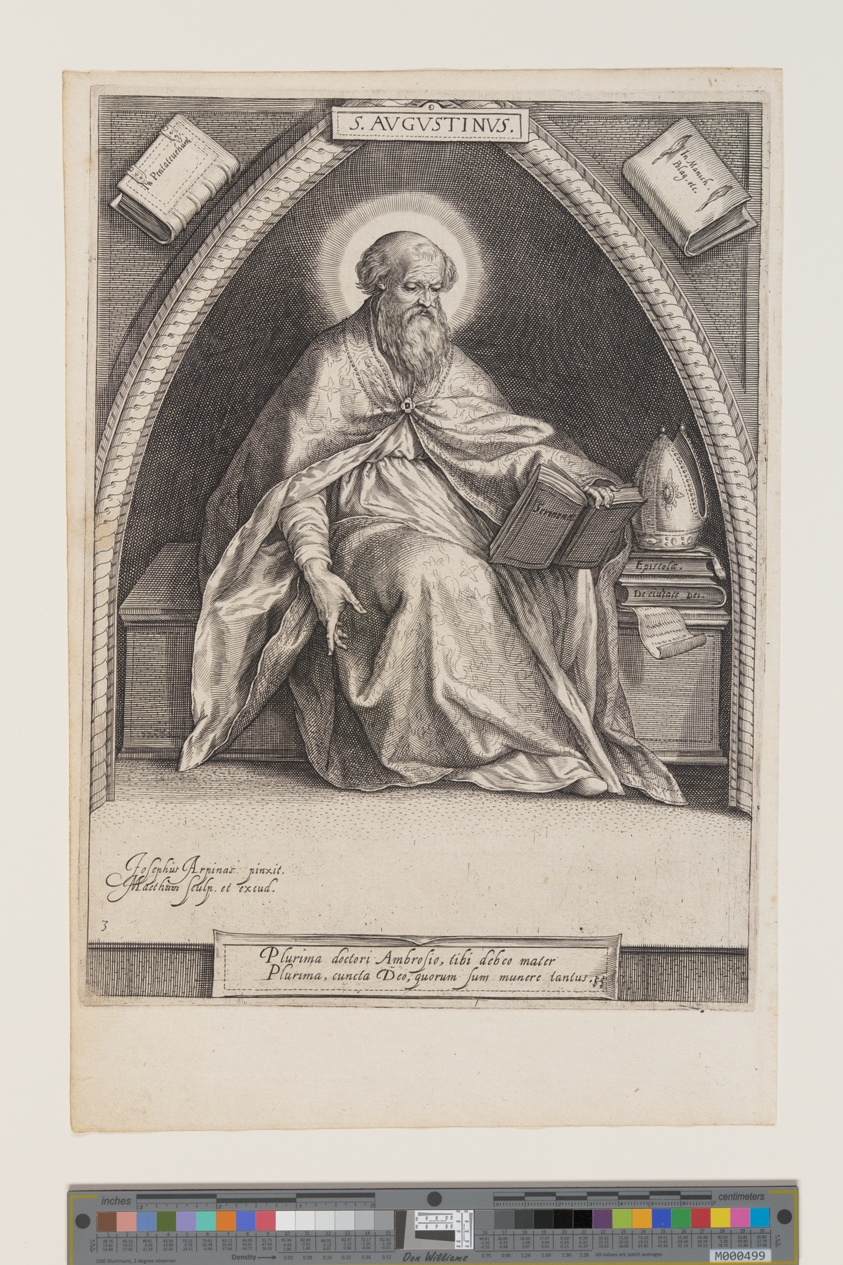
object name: Print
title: St Augustine, from The Fathers of the Church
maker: Jacob Matham (Dutch, 1571–1631); after Giuseppe Cesari (Italian, 1568–1640)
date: 1600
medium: Engraving on ivory laid paper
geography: Netherlands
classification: print; paper; prints and drawing; engraving